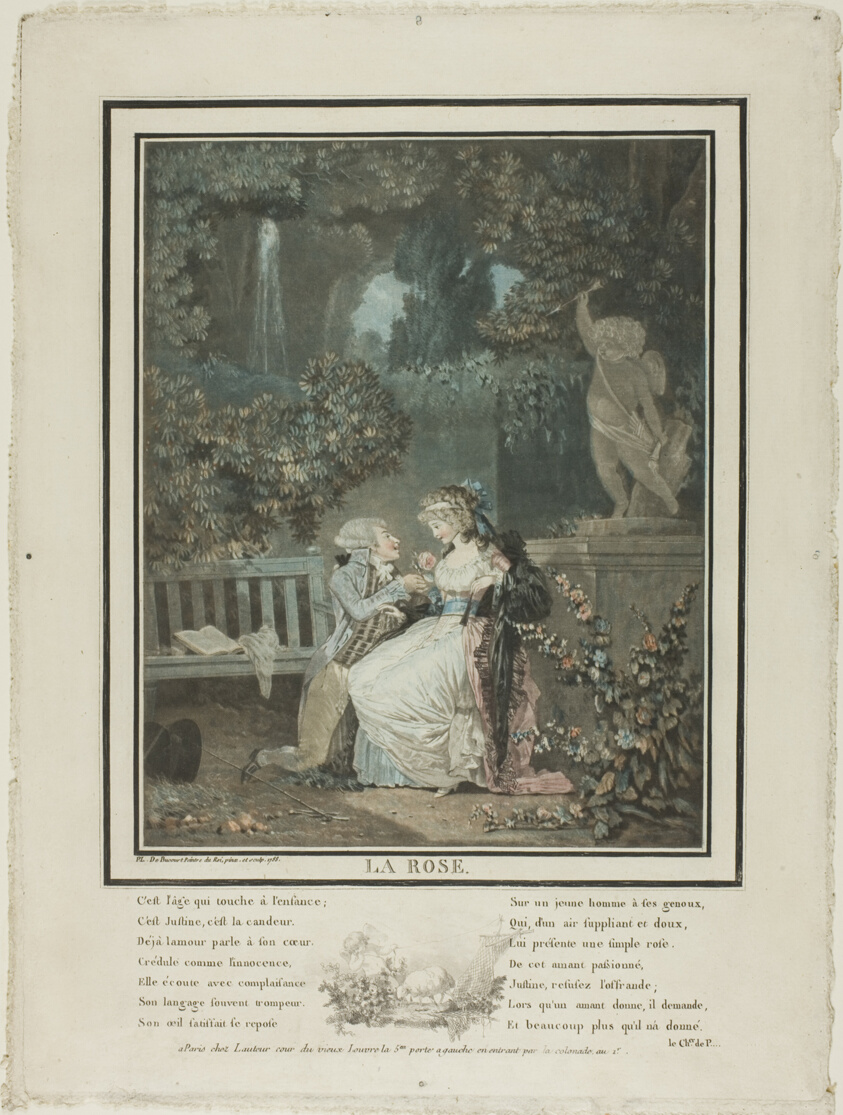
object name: Print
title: The Rose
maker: Philibert Louis Debucourt (French, 1755-1832)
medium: Color aquatint with engraving and etching in black ink on cream laid paper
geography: France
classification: engraving; print; prints and drawing